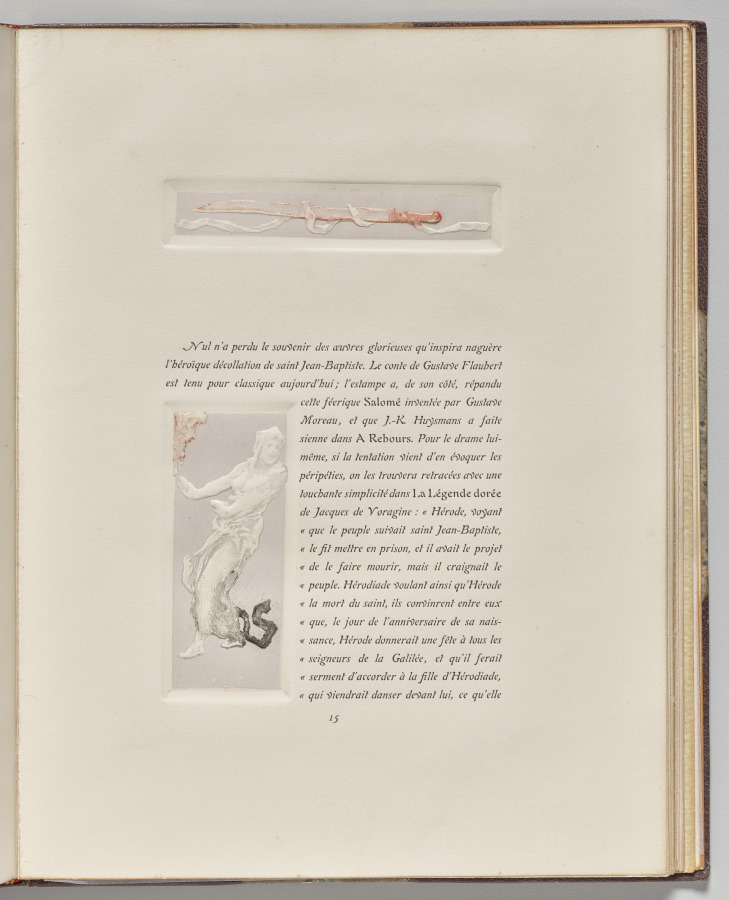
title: Decorative Knife Motif/ Dancing Woman with Arms in Pushing Gesture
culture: France, early 20th Century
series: La Loïe Fuller, by Roger Marx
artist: Pierre Roche (French, 1855–1922)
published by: Les Cents Bibliophiles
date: 1904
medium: gypsograph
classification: Bound Volume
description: Although best known as a sculptor, Roche was a versatile and prolific artist who worked in many mediums. Loïe Fuller, the pioneer of modern dance who took Paris by storm in 1892, was one of his favorite subjects. He portrayed her in clay, bronze, marble, plaster, and in a series of gypsographs that illustrated an essay by the art critic Roger Marx. The book was described as "a precious monument to Loïe Fuller."